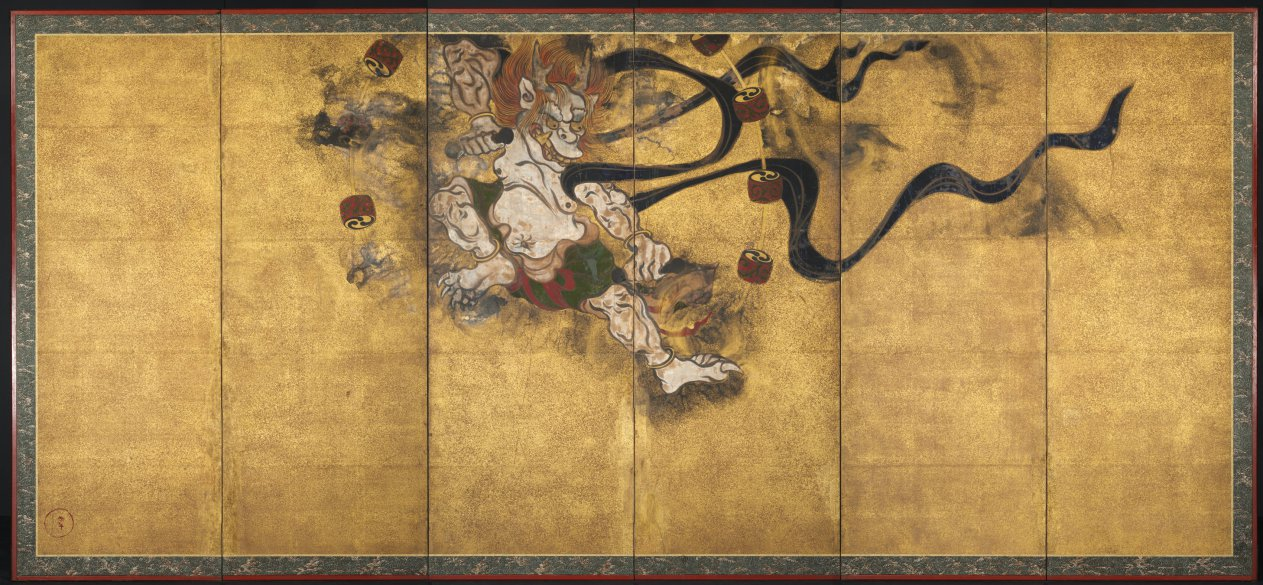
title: God of Thunder (Raijin)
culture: Japan, Edo period (1615–1868)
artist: studio of Tawaraya Sōtatsu (Japanese, c. 1570–c. 1640)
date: mid-1600s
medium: six-panel folding screen; ink, color, and gold on paper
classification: Painting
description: Such depictions of the God of Thunder originated in Buddhist art. Here, the image was painted on paper covered with gold dust, a technique often found in paintings by Tawaraya Sotatsu or of the Sotatsu school. This gold technique and the "Inen" seal here suggest that the anonymous painter of this screen was probably associated with the Sotatsu workshop. The artist used a prototype borrowed from earlier Japanese narrative painting—rather than mechanically reproducing Sotatsu’s image—and created a bold, innovative image that served the world of play and leisure in early Edo Japan. The theme of "God of Thunder" was often paired with "God of Wind" and has been frequently reinterpreted by generations of Rimpa artists. Unfortunately, the screen God of Wind which would have accompanied this God of Thunder cannot be located.